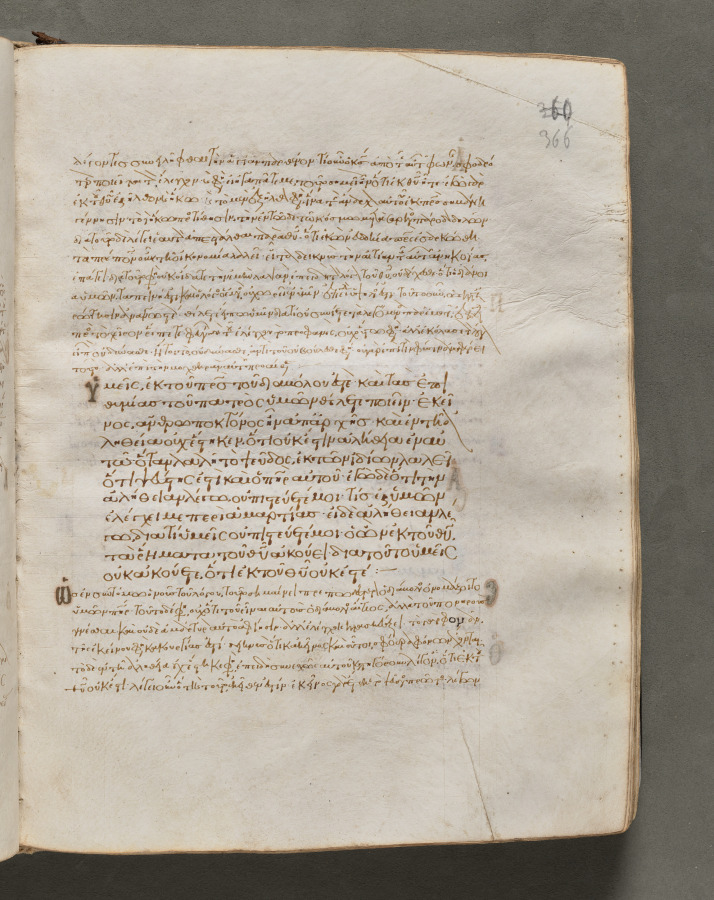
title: Text, folio 366 (recto), from a Gospel Book with Commentaries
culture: Byzantium, Constantinople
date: c. 1000–1100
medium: ink, tempera, and gold on vellum; leather binding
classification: Bound Volume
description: Each of the four gospels in this book opens on a page with brilliantly illuminated borders depicting the author of the text as well as birds—principally peacocks, symbols of the immortality of the soul—and fountains, representing the fountain of life and the salvation of the soul. This volume consists of 428 leaves with texts in Greek. Its level of sophistication suggests that it was probably written and decorated in a monastery in Constantinople.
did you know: Gospel books were carried in procession through Byzantine churches.